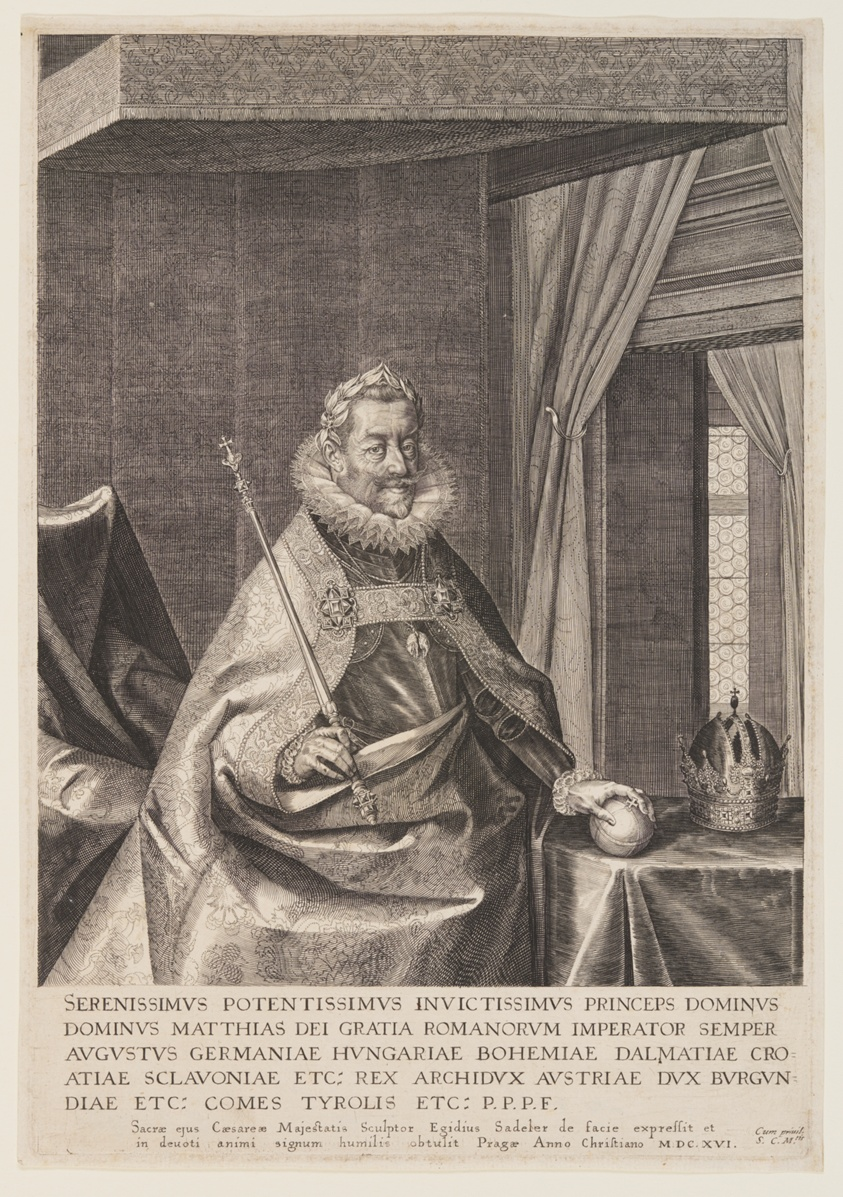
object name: Print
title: Emperor Matthias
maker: Aegidius Sadeler II; Flemish, c. 1570–1629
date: 1616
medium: Engraving on ivory laid paper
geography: Flanders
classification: print; paper; prints and drawing; engraving